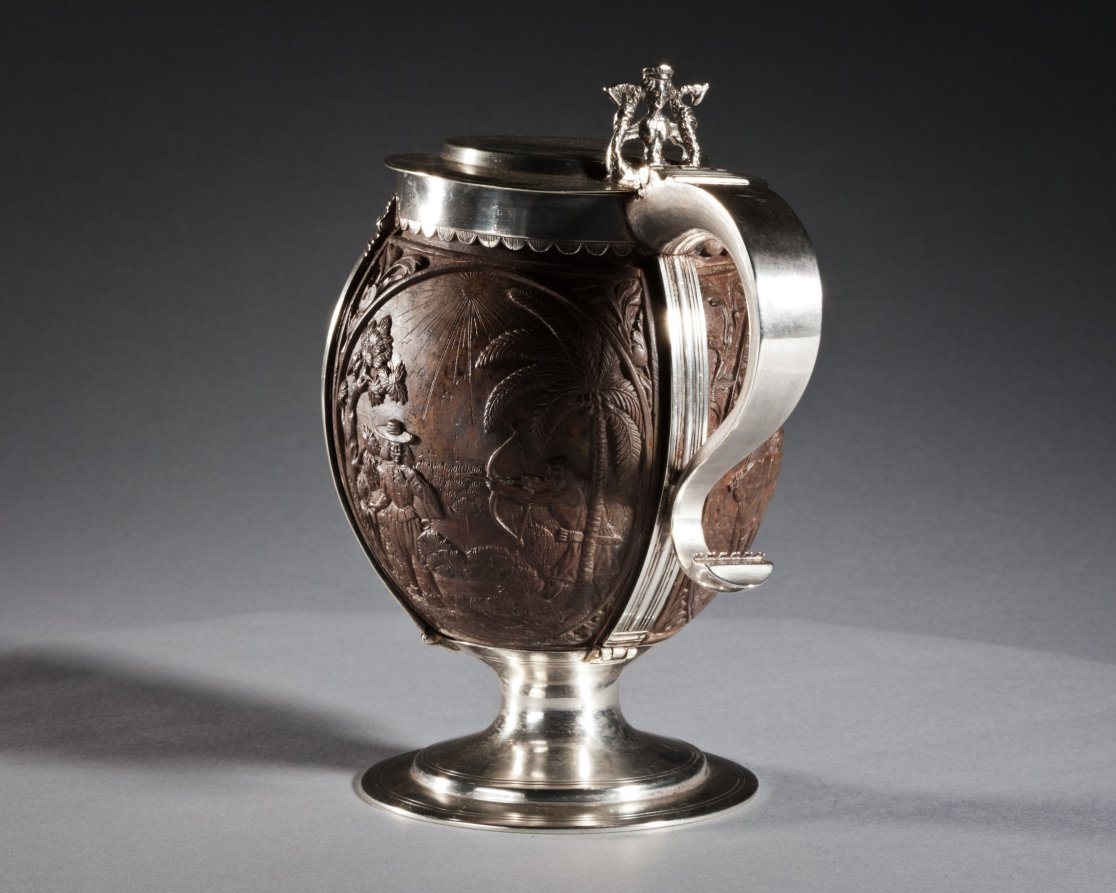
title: Coconut Cup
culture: carved coconut, probably The Netherlands; silver mount, probably England, 17th century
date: c. 1630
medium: carved coconut in silver mount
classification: Metalwork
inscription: top lid has engraved coat-of-arms, underside of lid has inscription: George Lewis TIVERTON Feby, 1st 1760.